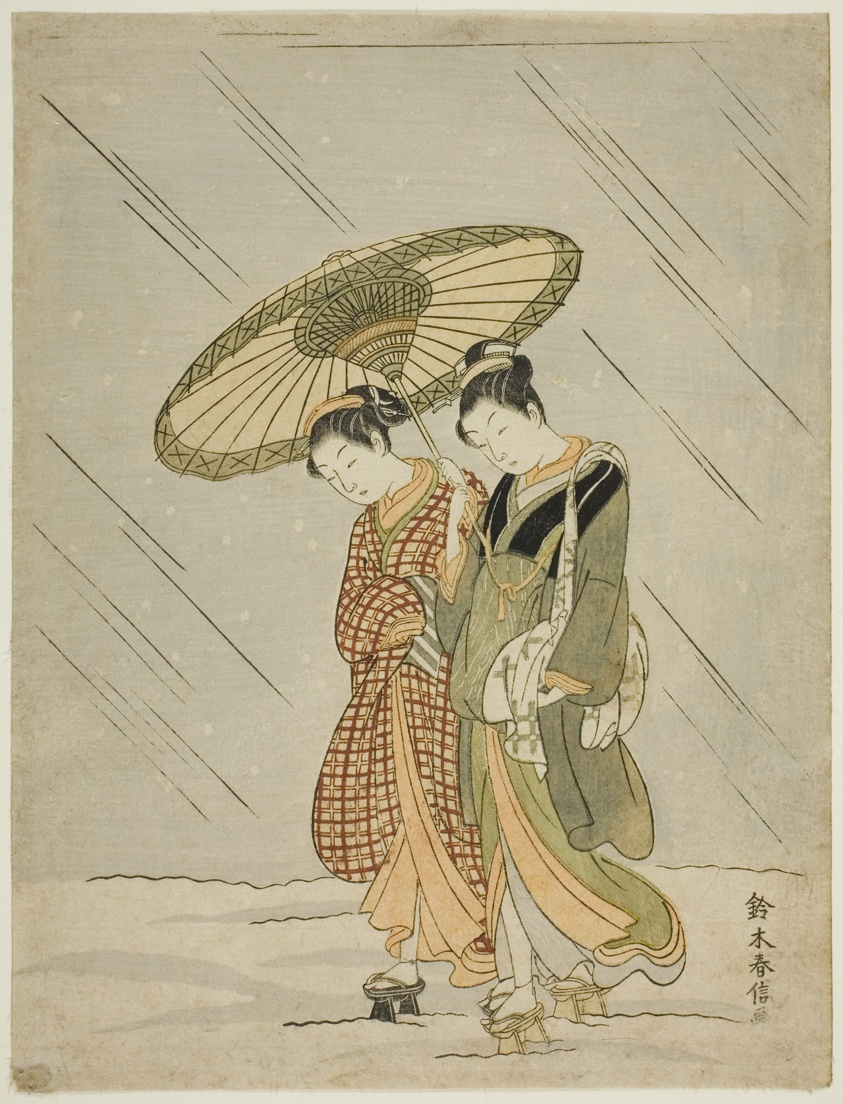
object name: Print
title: Snow on the Way Back from the Public Bath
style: Japanese (culture or style)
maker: Suzuki Harunobu 鈴木 春信; Japanese, 1725 (?)-1770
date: c. 1766/67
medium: Color woodblock print; chuban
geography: Japan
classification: woodblock print; print; asian art